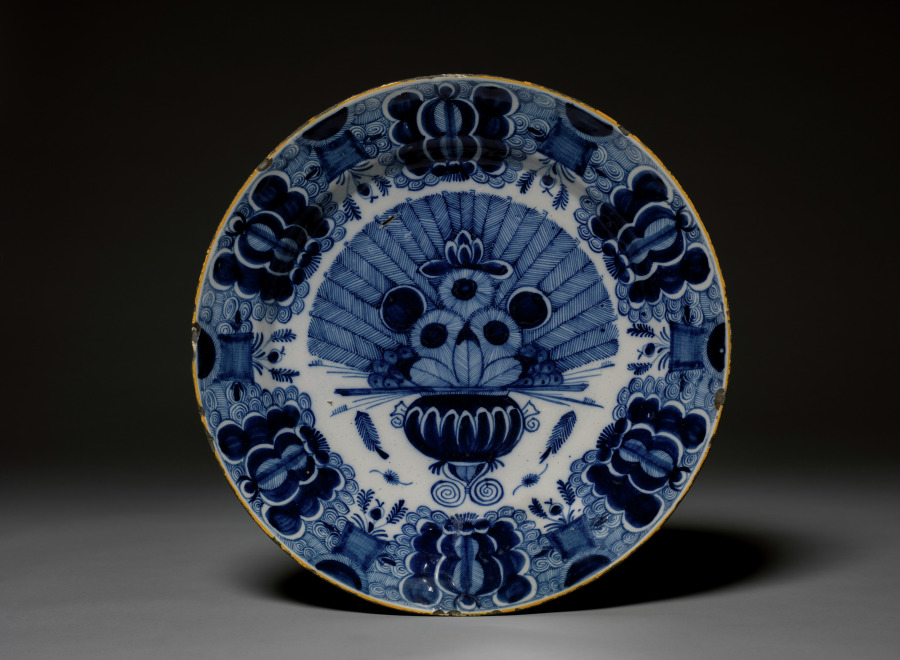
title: Plate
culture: Netherlands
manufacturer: probably by De Porceleyne Claeuw Factory (Dutch)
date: 1700s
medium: Delft ware (tin glazed earthenware)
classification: Ceramic